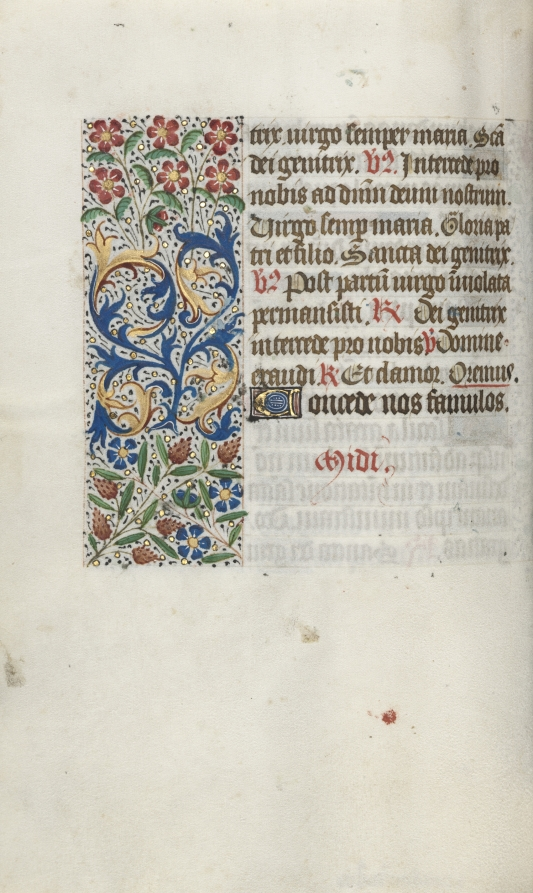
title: Book of Hours (Use of Rouen): fol. 63v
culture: France, Rouen, 15th century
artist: Master of the Geneva Latini (French, active Rouen, 1460–80)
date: c. 1470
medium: ink, tempera, and gold on vellum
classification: Bound Volume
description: In the late 1400s and early 1500s Rouen was an established and important center of book production. The city’s cathedral had a wealthy chapter that spent large sums of money to commission books and to maintain its extensive library. The stationers and booksellers would have likely been concentrated in or near the cathedral precinct. This artist, named after a manuscript now in Geneva, was Rouen’s principal illuminator during the second half of the 1400s.